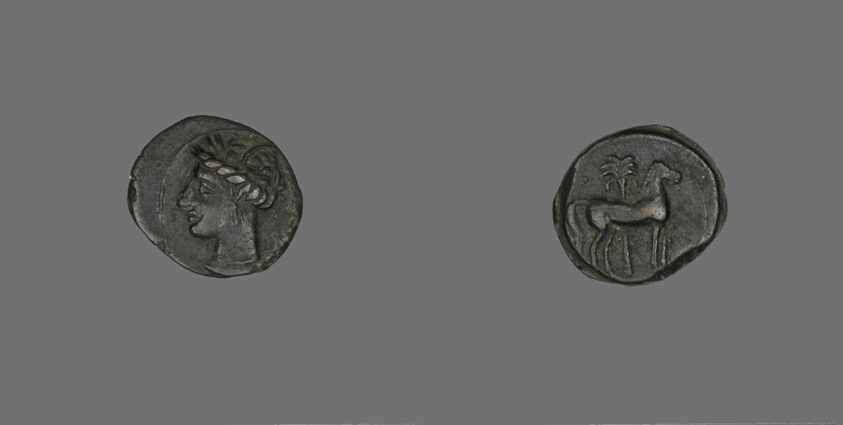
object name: Coin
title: Coin Depicting a Horse and Palm Tree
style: phoenician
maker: Carthaginian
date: 3rd century BCE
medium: Bronze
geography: Carthage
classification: coin; ancient art